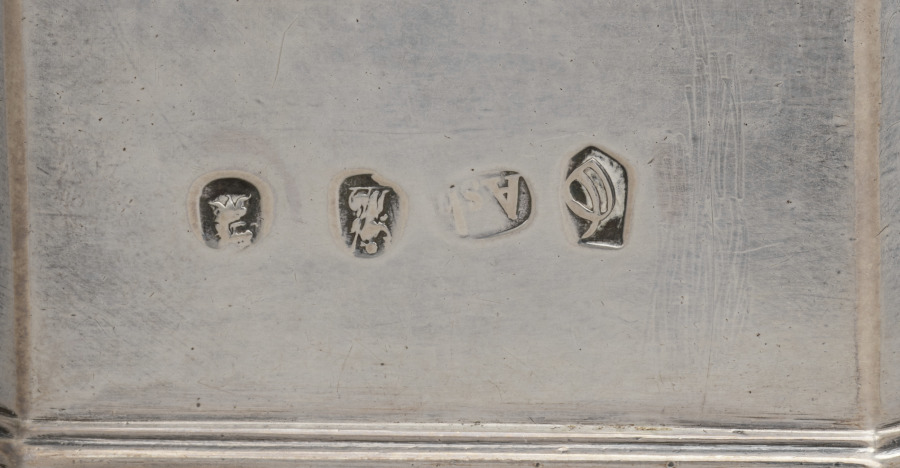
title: Tea Caddy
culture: England, London, 18th century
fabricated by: Thomas Ash (British)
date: 1713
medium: silver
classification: Silver